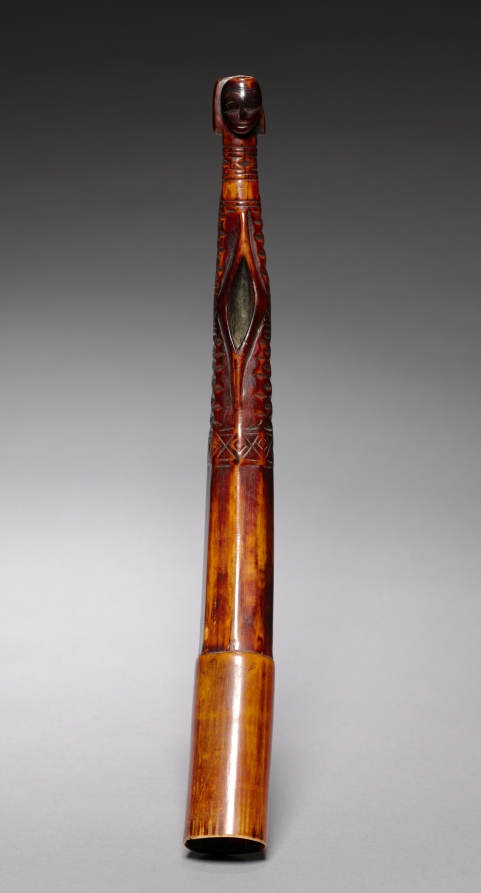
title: Side-Blown Trumpet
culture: Equatorial Africa, Cameroon; Fang, 19th century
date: late 1800s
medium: Elephant ivory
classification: Musical Instrument